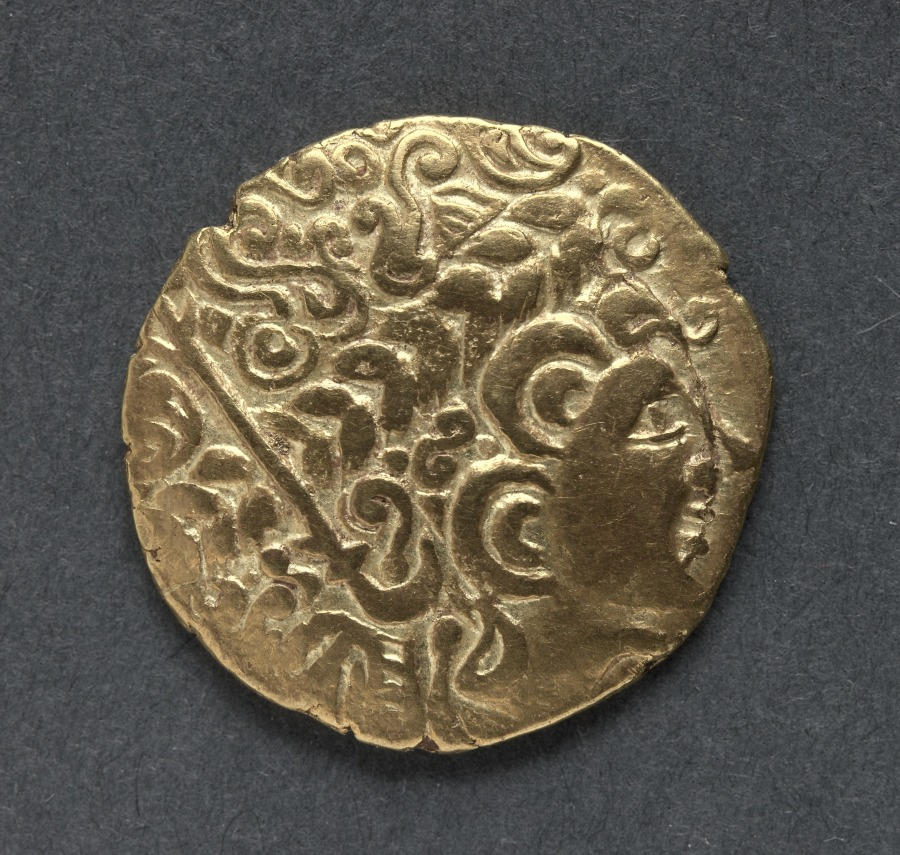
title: Stater: Head (obverse); Horse with Victory (reverse)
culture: England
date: c. 125–100 BCE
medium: gold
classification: Coins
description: Like many other pieces in the ancient British series of staters, those of the Bellovaci, which were struck on the mainland of Europe and in Britain, take their type from the gold staters of Philip II of Macedon (359–336 BC). This original coin was copied and recopied over a long period of time, the copies becoming on occasion very crude pieces. The head on the piece shown is a run-down form of the head of Philip while the reverse is all that is left of the chariot of Apollo, the Sun God, and its driver.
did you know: The Bellovaci were a Belgic tribe located near the present-day city of Beauvais, France, during the Iron Age and the Roman period.